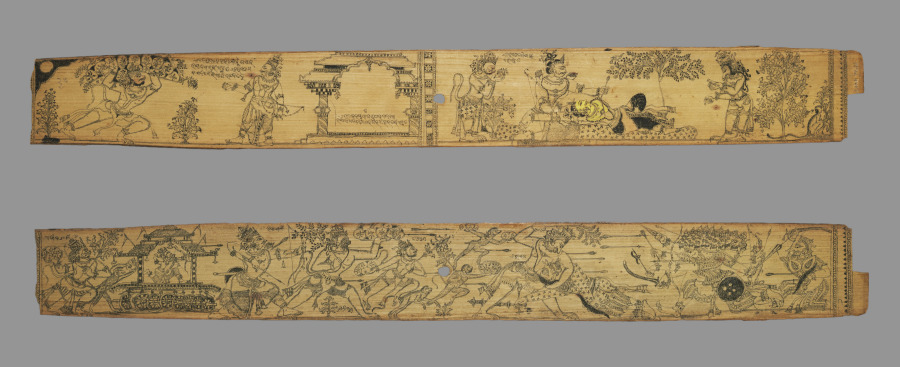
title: Leaf from a Romance of Chandrabhanu and Lavanyavati of Upendra Bhanja (Indian, died 1740)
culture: Eastern India, Odisha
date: late 1700s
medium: Charcoal on palm leaf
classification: Painting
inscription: on both recto and verso in Oriya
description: This leaf from an 18th-century romance manuscript comes from a section of the book that retells the epic battle between the demon Ravana and the god-hero Rama. The 10-headed multiarmed demon Ravana is the second figure from the right. Rama’s army of monkeys and bears, wielding tree branches and clods of earth, fill the remainder of the leaf. The images were created using a stylus that incised into the palm leaf; charcoal was then rubbed over the leaf and wiped off, leaving only the incised areas in black.